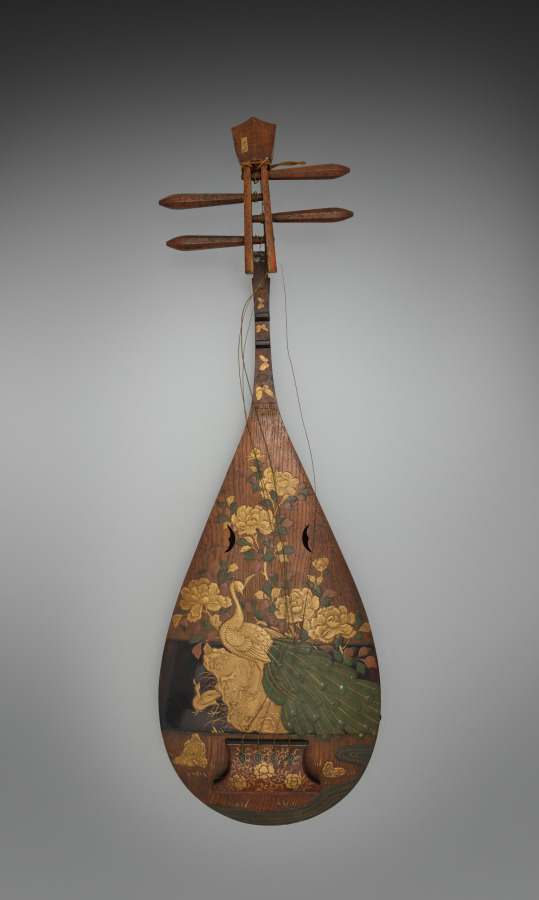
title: Bugaku Biwa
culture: Japan, Edo period (1615–1868)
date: early to mid-1800s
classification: Musical Instrument